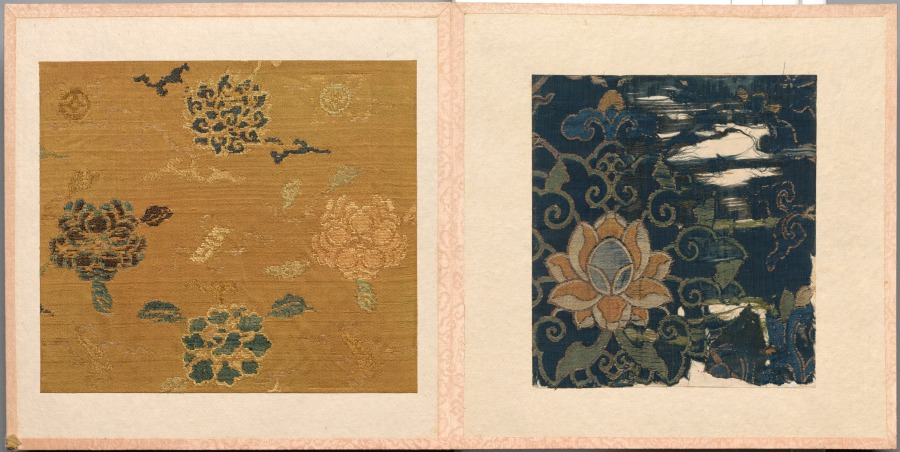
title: Album of Textile Samples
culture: Japan and China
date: 1700s–1800s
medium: silk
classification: Textile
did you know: This album contains 46 pages with 156 mounted Chinese or Japanese textile samples.